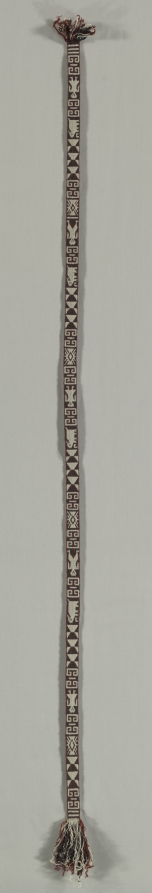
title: Belt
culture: Ecuador, 20th century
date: c. 1900s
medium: wool and jute; warp face, extended tabby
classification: Garment